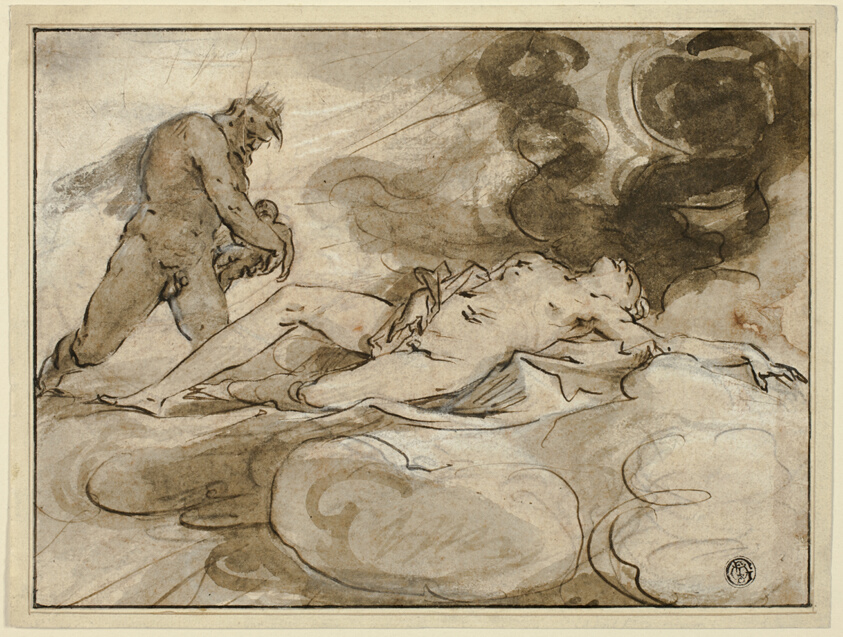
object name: Drawing and Watercolor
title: Jupiter and Semele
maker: Attributed to Jan Harmensz Muller; Dutch, 1571-1628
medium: Pen and brown ink, with brush and brown wash, heightened with lead white (discolored), over black chalk on ivory laid paper, toned with red chalk, laid down on cream laid paper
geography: Netherlands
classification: ink or chalk wash; drawings (visual works); prints and drawing